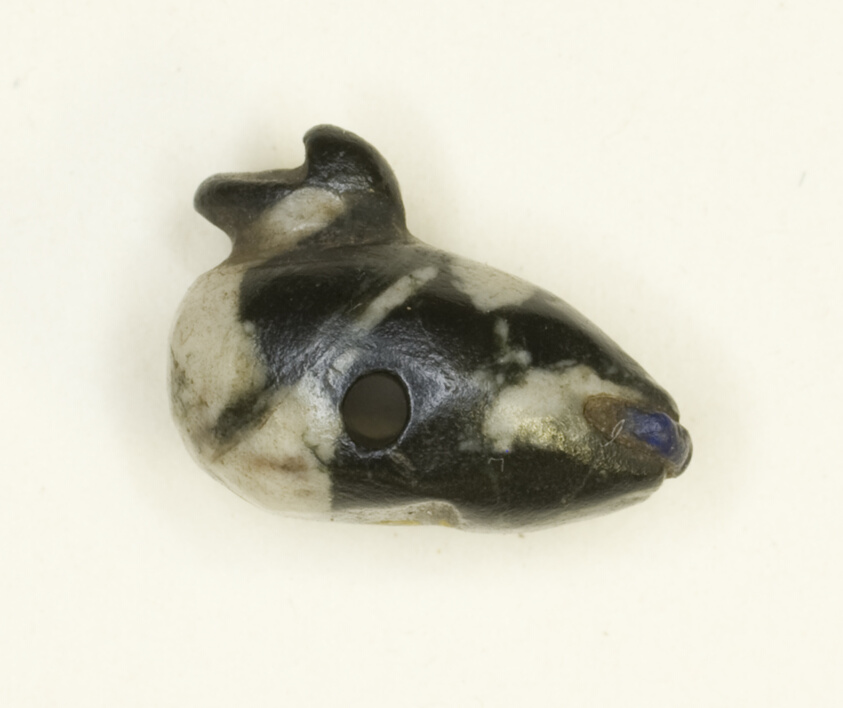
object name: Costume and Accessories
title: Amulet of a Duck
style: egyptian, middle kingdom, ancient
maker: Egyptian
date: Middle Kingdom (?) (about 2055–1650 BCE)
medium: Diorite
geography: Egypt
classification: amulet; jewelry; stone; ancient art; costume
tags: ducks, birds